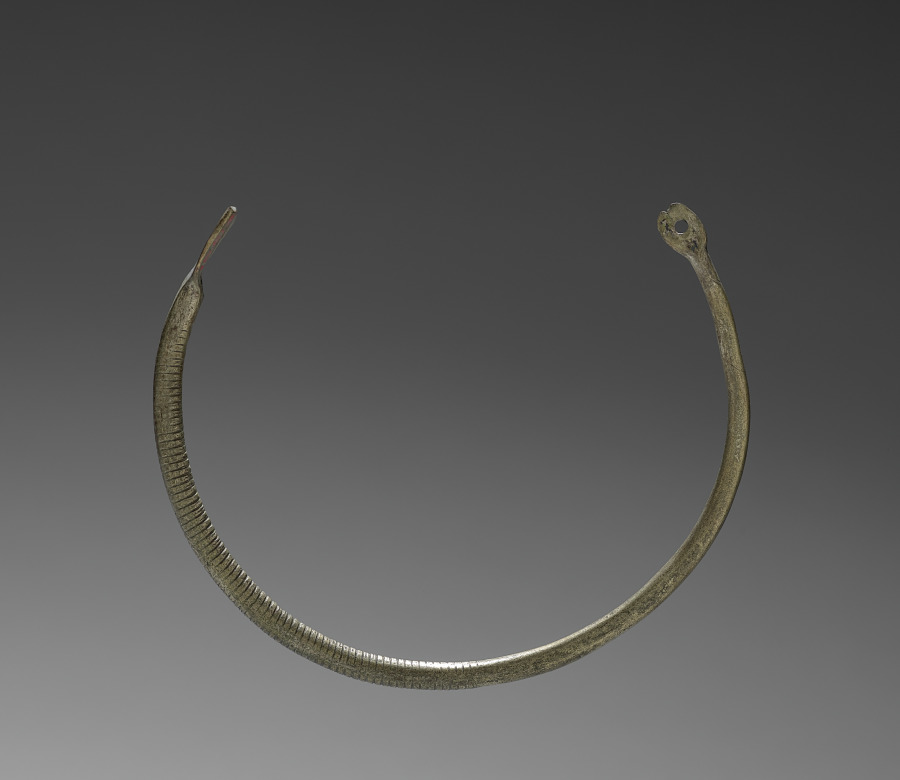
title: Nose Ring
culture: Indo-Chinese, made in France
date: 20th Century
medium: silver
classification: Jewelry